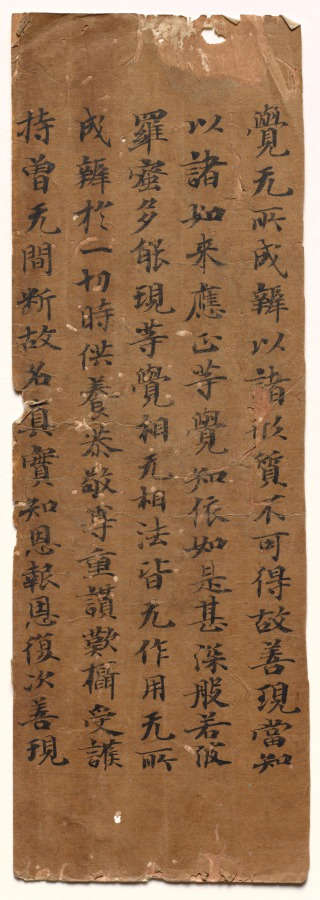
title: Text of the Perfection of Wisdom (Mahāprajñāpāramitā) Sūtra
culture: China, Tang dynasty (618-907)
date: c. 700s-800s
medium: Album leaf, ink on dyed paper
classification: Bound Volume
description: This precious text fragment is one of the earliest calligraphies in the collection. The text is copied from the Mahāprajñāpāramitā Sūtra (also called the Perfection of Wisdom Sutra (Chinese: 摩訶般若波羅蜜多經; Móhā Bōrĕ Bōluómìduō jing). The passage is part of a collection of sacred Buddhist texts written in India around 100 BC to AD 600 that were translated in the 700s by the Chinese monk Xuanzang. The paragraph is written in regular script style (kaishu) with deep black characters on brown aged paper that may have originally been dyed yellow. Mahāyāna Buddhism teaches that faithfully copying sutra texts is a good deed that helps one accumulate merit and the Buddha’s blessings—a way to gain rebirth in the Western Paradise.